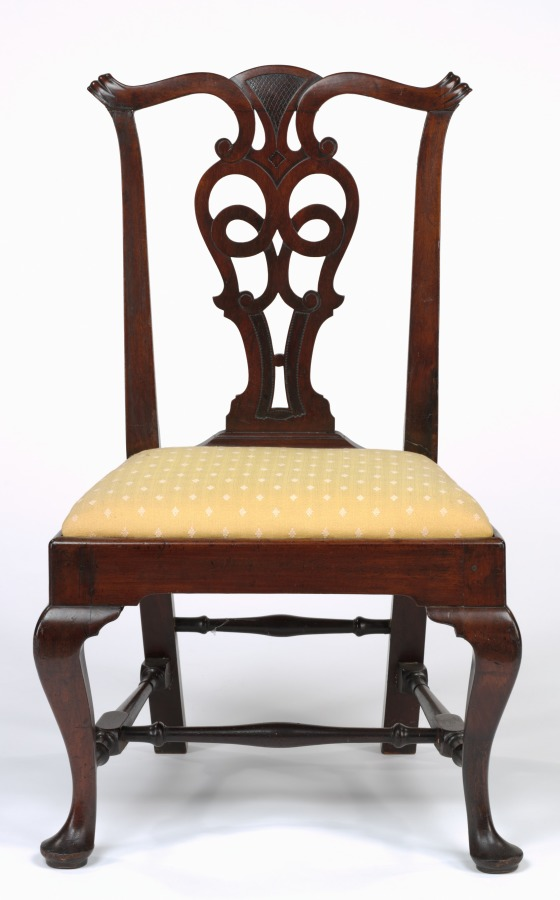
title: Side Chair (1 of 2)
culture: America, Rhode Island, Newport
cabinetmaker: John Townsend (American, 1732–1809)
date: c. 1775–90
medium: mahogany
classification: Furniture and woodwork